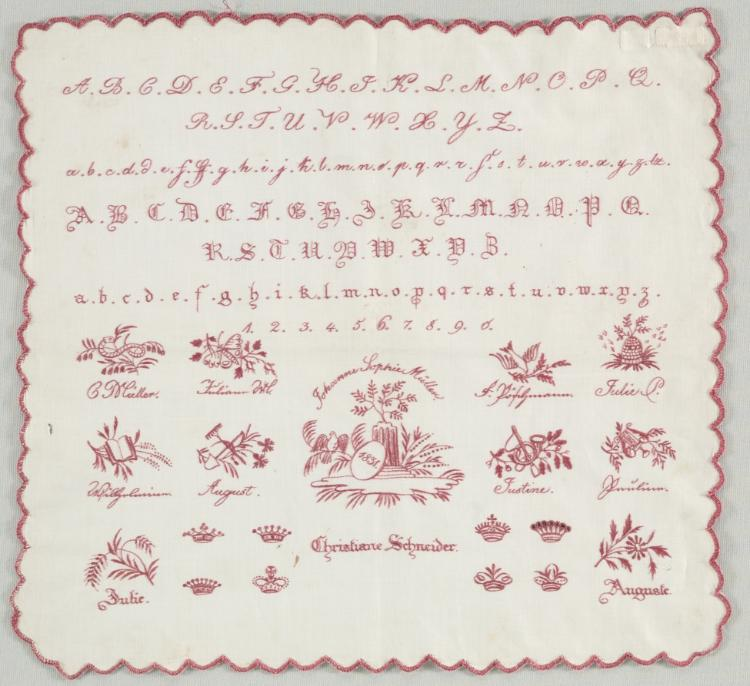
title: Sampler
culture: Germany, Early 19th century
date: 1831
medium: embroidered cotton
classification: Sampler